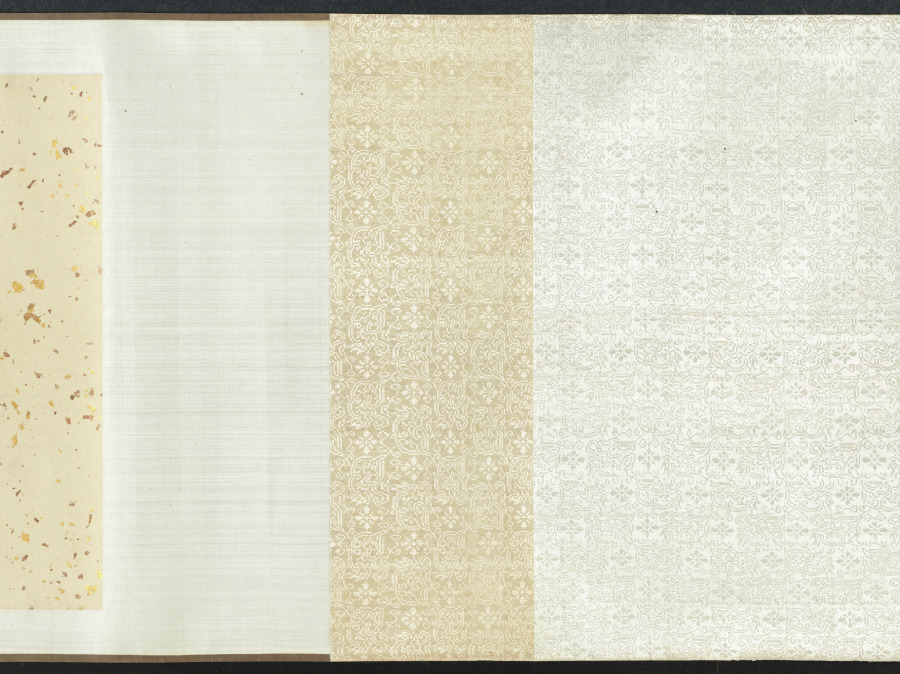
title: Ink Flowers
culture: China, Yuan dynasty (1271-1368)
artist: Zhao Zhong (Chinese, second half of the 1300s)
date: 1361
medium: Handscroll; ink on paper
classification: Painting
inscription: 寶帶同心結，香羅合歡扇。/ 繡作錦鴛鴦，雙雙為君獻。/ 薔薇露灑熏籠衣，馨香奉君君勿違。 原初并題。 [印] 趙衷原初畫記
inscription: 翠袂素羅韈，玉臺黃金盃。浩歌渡弱水。天風卷海三山開，麻姑方平為招飲，蛟宮獻舞銀濤堆。 原初并題。 [印] 雲林清趣、[印] 趙衷原初畫記。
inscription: 右用湯叔雅慶元中所寫墨花法作此卷，又效李長吉體賦詩以題之。詩與畫雖未工，要皆出於古人之餘，譬猶欲成方圓而必求其規矩之用也，識者毋誚焉！至正辛丑八月望日，東吳野人趙衷原初謹識。 [印] 趙原初、[印] 傳世清玩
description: Zhao Zhong's flowers, each paired with a poem, echo the fine-style colored flowers of the academic tradition, but instead he used only ink. Fine lines define the contours of each plant, as well as the veins within each petal and leaf. Careful ink washes give subtle modeling to the forms. The combination of lily, narcissus, and peony is unusual as the three belong to no known seasonal or symbolic system popular in the fourteenth century. Zhao’s medical training may have influenced the selection. Powdered lilies, for example, were prescribed to dispel grief, while the bark of tree peony roots was used as a treatment for various blood disorders.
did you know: This handscroll is a very rare example of ink flowers in the linear baimiao style of the fourteenth century.